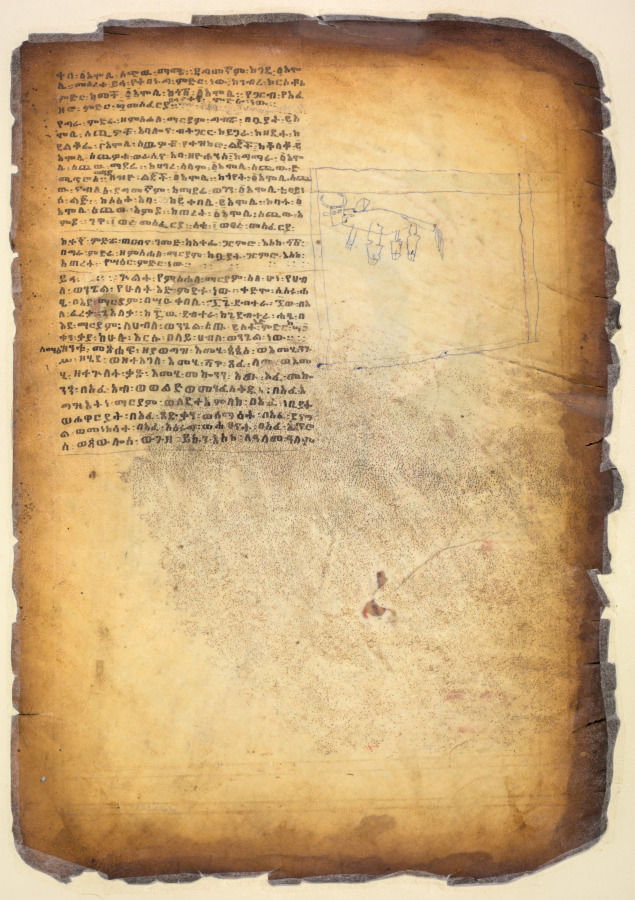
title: Single Leaf from a Gospel Book with a Portrait of Saint Luke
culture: Empire of Ethiopia, Tigray region (Ethiopia)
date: c. 1440–80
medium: ink and tempera on vellum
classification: Manuscript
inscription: ሥእለ ፡ ቅዱስ ፡ ሉቃስ ፡ ዘዜነወ ፡ ባአምስለ ፡ ላሀም ፡ ጸሎቱ ፡ ወበረከቱ። ተሀሉ ፡ ምስሌነ፡ አሜን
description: Christianity arrived in Ethiopia during the 300s CE, well before reaching northern Europe. Typical of panel and manuscript painting in Ethiopia, this leaf is decorated with bright colors and a joyous interplay of geometric pattern. The full-page miniature depicts the evangelist Luke, with his symbol, the ox, within the arch above. The short text is in the Ge‘ez (the centuries-old church language of Ethiopian Orthodoxy) and consists of the opening lines of the gospel of Luke: “Make this image of St. Luke with this bull––his prayer (offering)––and with his blessings, they were with us. Amen.”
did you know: The majority of Ethiopian manuscripts are written in Ge’ez, the ancient liturgical language of Ethiopia.